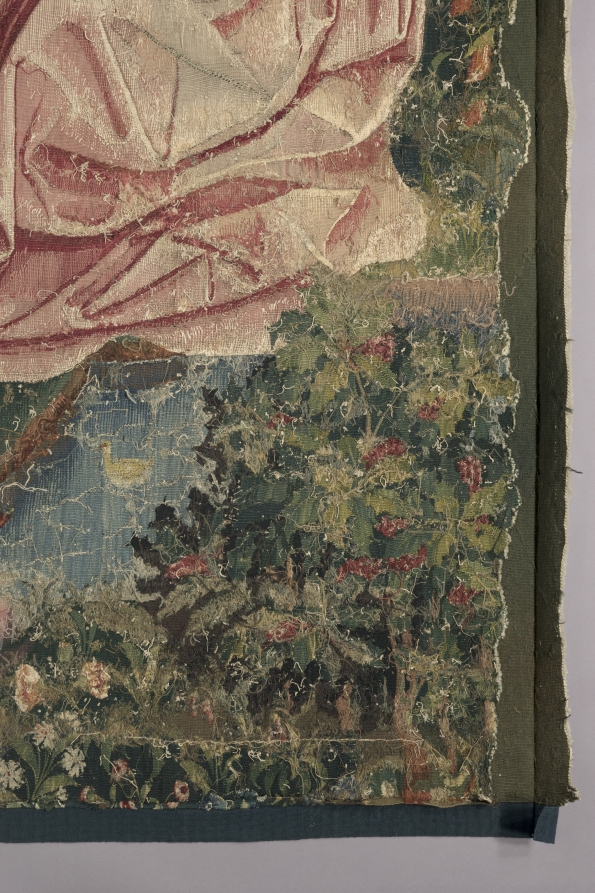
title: The Triumph of Eternity (from Chateau de Chaumont set)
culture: France, Lyon(?), early 16th century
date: 1512–15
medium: silk and wool; tapestry weave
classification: Tapestry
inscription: French verse in Gothic letters translates as follows: "Nothing triumphs by right authority, Unless it be conducted by Eternity. Nothing is permanent beneath the firmament, But above us triumphs Eternity."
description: The Triumph of Eternity is represented by the Coronation of the Virgin. Dressed in crimson velvet with an opulent brocaded velvet shawl, the Virgin is seated in the center as two angels hold a crown over her head. Five musical angels surround her playing an organ, recorder, straight cornetto, harp, and lute, while another sings from an open music book. The scenes in the set display a conservative style in which the figures are placed in shallow landscapes, thereby ignoring pictorial innovations for depicting space and mass. The verse in Old French at the top states: Nothing triumphing by due authority Remains permanent and durable. Nothing is permanent under the heavens, But above, eternity triumphs.